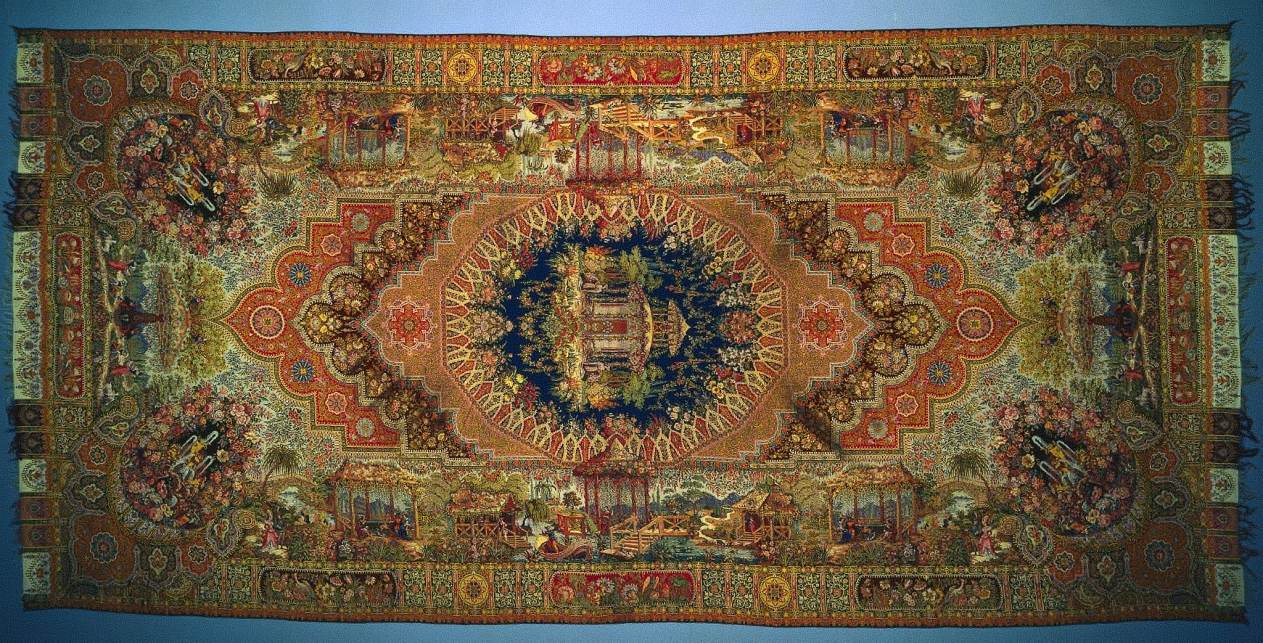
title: Shawl with Genre Scenes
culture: France, Paris or Lyon, 3rd quarter 19th century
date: 1875–1899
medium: woven silk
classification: Textile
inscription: signed: "CHANSEAU."